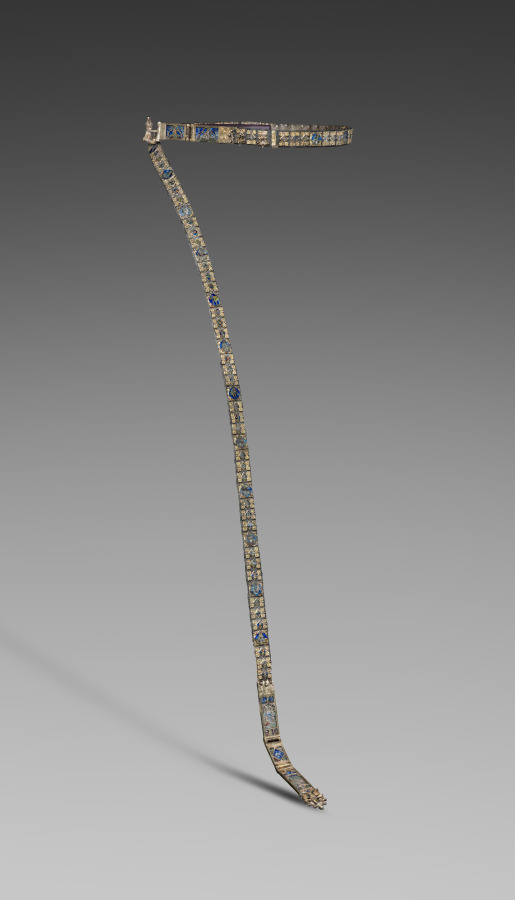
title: Belt for a Lady's Dress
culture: Italy, Siena(?)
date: c. 1375–1400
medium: basse-taille enamel and gilding on silver, silver thread, gilt-silver buckle, cast and chased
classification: Jewelry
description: Because of its extraordinary richness, this belt (also known as a girdle) was both an ornament for the body and an object of great personal luxury. Almost eight feet in length, belts like this were at the height of fashion for both men and women. After being passed around the waist and through the buckle, one end of the belt would fall to the hem of the garment. The belt's many colorful enamel plaques are worked in translucent enamel over decoration engraved into the silver beneath (an enameler's technique known as basse-taille). Within the plaques and cast into the buckle are scenes of courtly love, musicians, and fantastic animals. A large number of translucent enamels were made for secular objects during the late Middle Ages for use on jewelry, cups, garment clasps, and similar objects. This belt is a rare survival among these now scarce objects.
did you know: Look closely at the tiny scenes of courtly love on the plaques that adorn this belt. Given their size, these scenes were designed for the enjoyment of the woman who wore this belt over a sumptuous dress rather than an admirer from a distance.